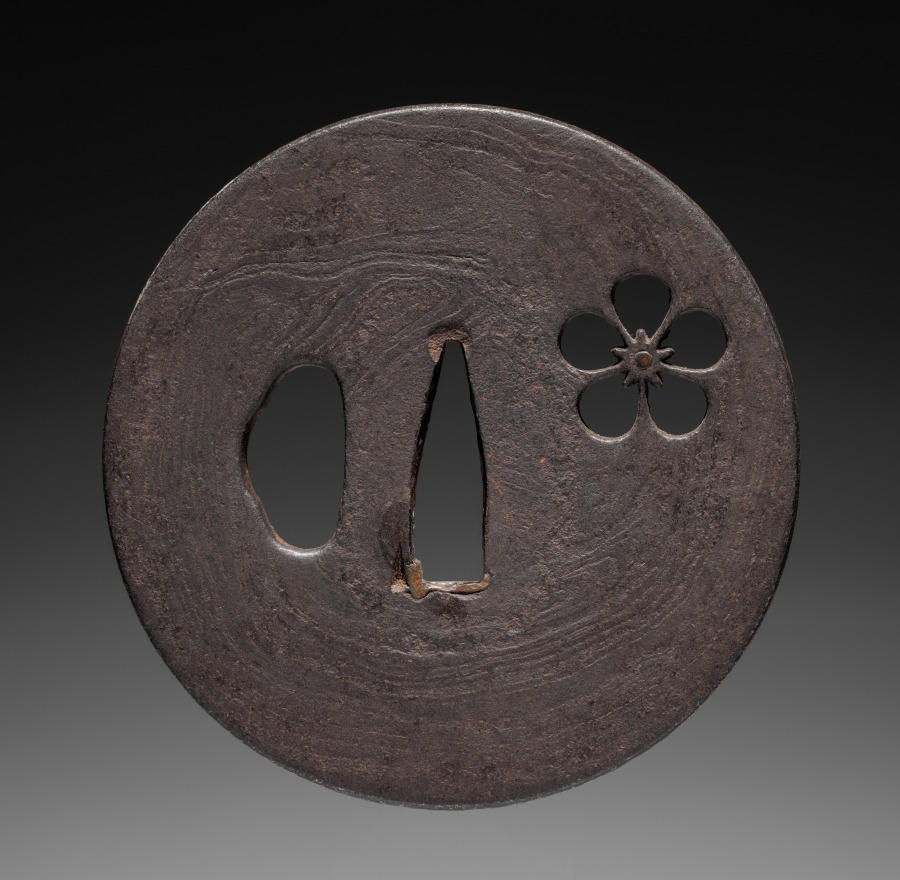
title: Sword Guard (Tsuba) with Plum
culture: Japan, possibly Edo period (1615-1868)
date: c. 1615–1868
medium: iron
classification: Arms and Armor